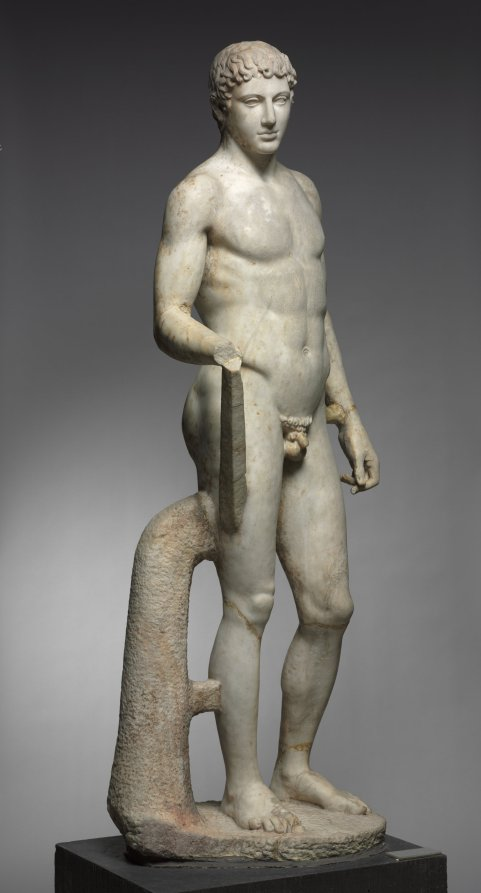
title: Statue of an Athlete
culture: Italy, Roman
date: 1–100 CE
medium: marble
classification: Sculpture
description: This idealized athlete recalls Greek sculptural types invented and popularized during the 400s BC. Large-scale athletes and other sculptures like this were originally created by famous artists as sanctuary dedications. Centuries later, they were widely copied and adapted by Roman sculptors, whose clients sought their own versions of earlier masterpieces. Working in marble rather than bronze, these sculptors added certain elements for stability, such as the struts and the large tree trunk beside the right leg here. Sculptures like this one are profoundly complex, made by and for Romans but descended from Greek ancestors.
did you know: For many years, this sculpture stood in the rotunda of the Cleveland Museum of Art.